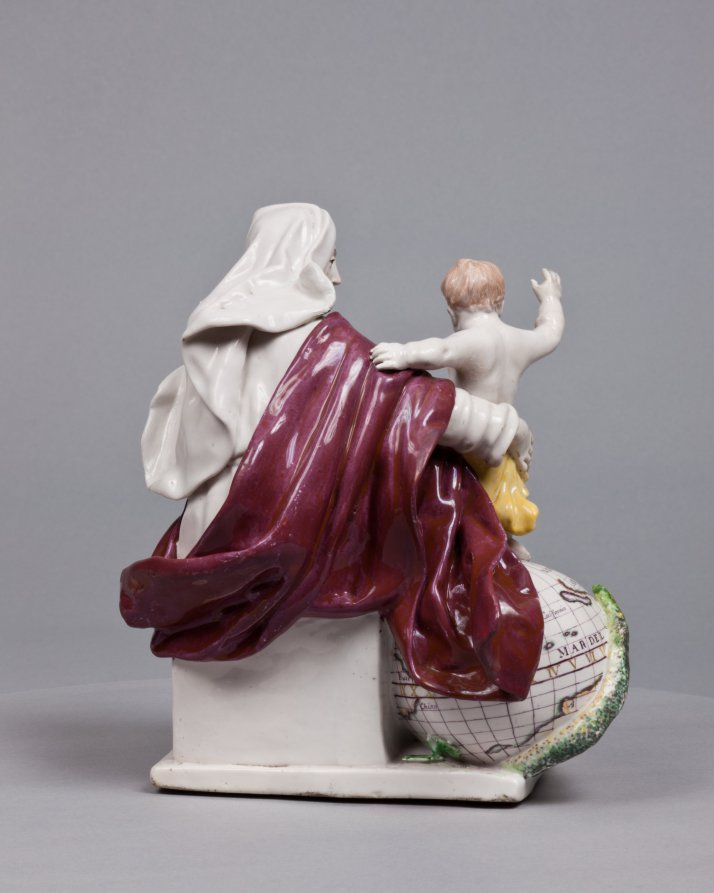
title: Madonna and Child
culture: England, Chelsea, 18th century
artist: Chelsea Porcelain Factory (Britain, London, 1745–84)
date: c. 1755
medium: porcelain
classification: Ceramic